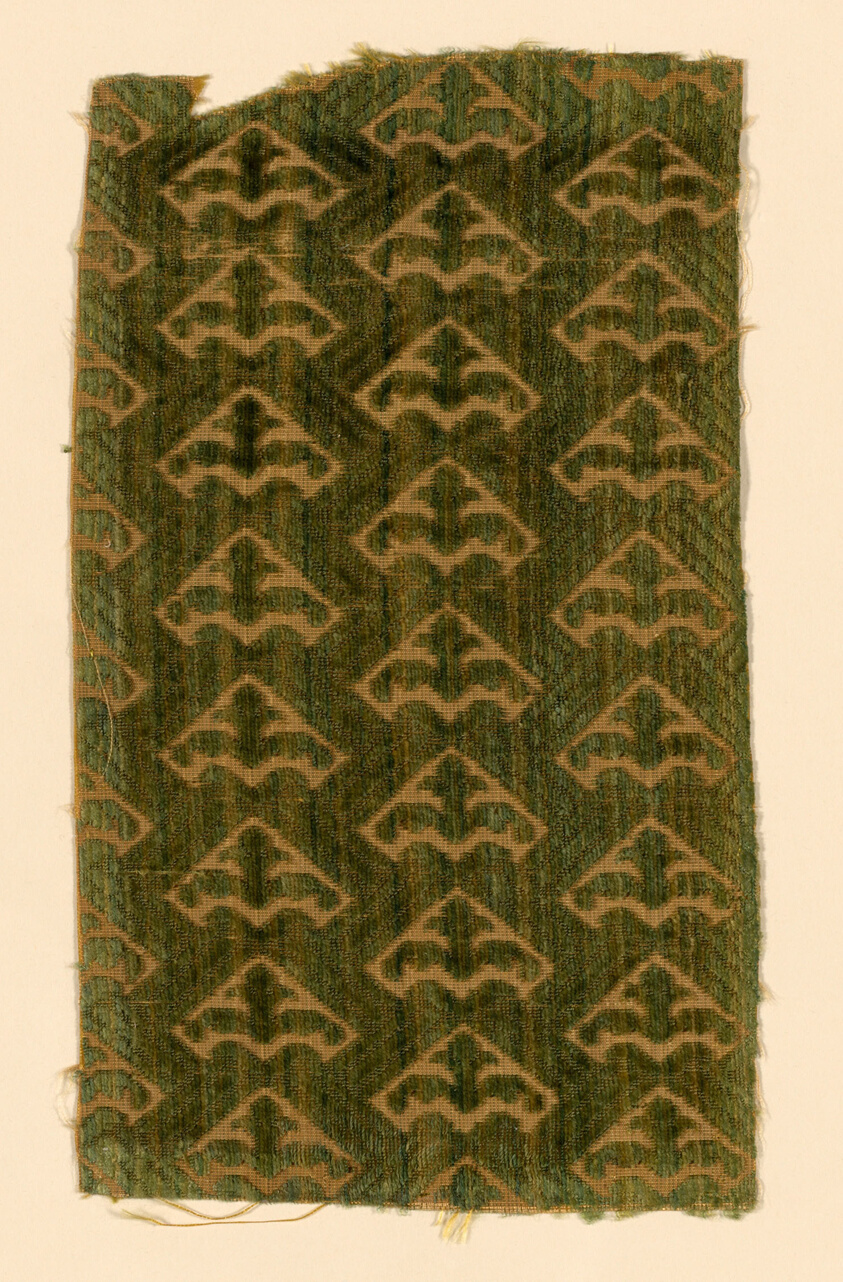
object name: Textile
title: Fragment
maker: Italy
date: 1601/35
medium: Silk, cut, uncut, and voided velvet against plain weave foundation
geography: Italy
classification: textile; weaving - velvet; weaving